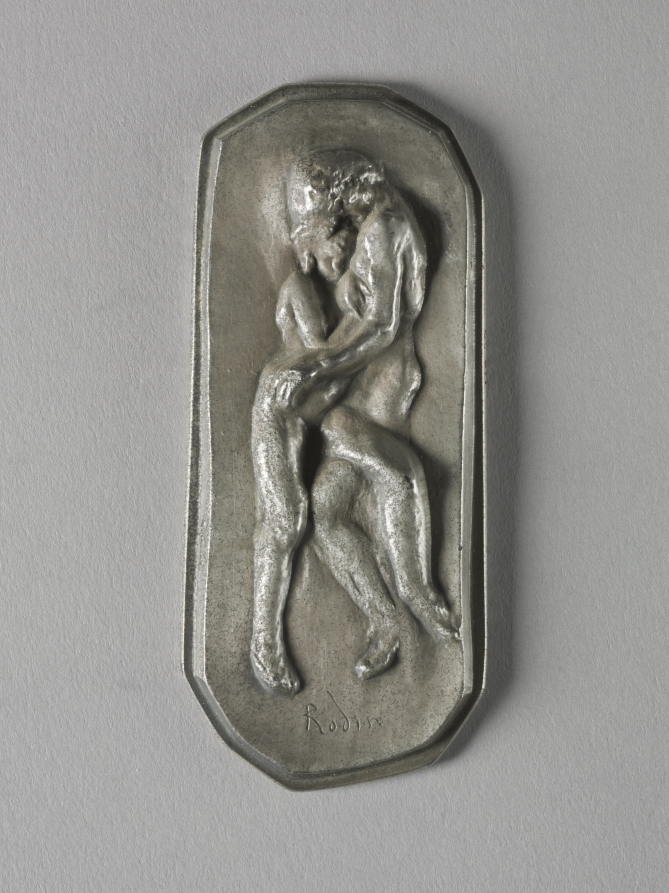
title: Medal: Protection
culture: France, early 20th Century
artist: Auguste Rodin (French, 1840–1917)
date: 1916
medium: silver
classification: Metalwork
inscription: inscribed at bottom: "Rodin"; stamped on frame: "Argent." Inscribed on back: "Protection/compose par/Auguste Rodin/pour "The French Actors Fund"/au profit de l'aide aux artisted/et employes de theatre/en collaboration/avec/L'Association/des directeurs de theatre/de Paris/ Paris. New York/MCMXVI."